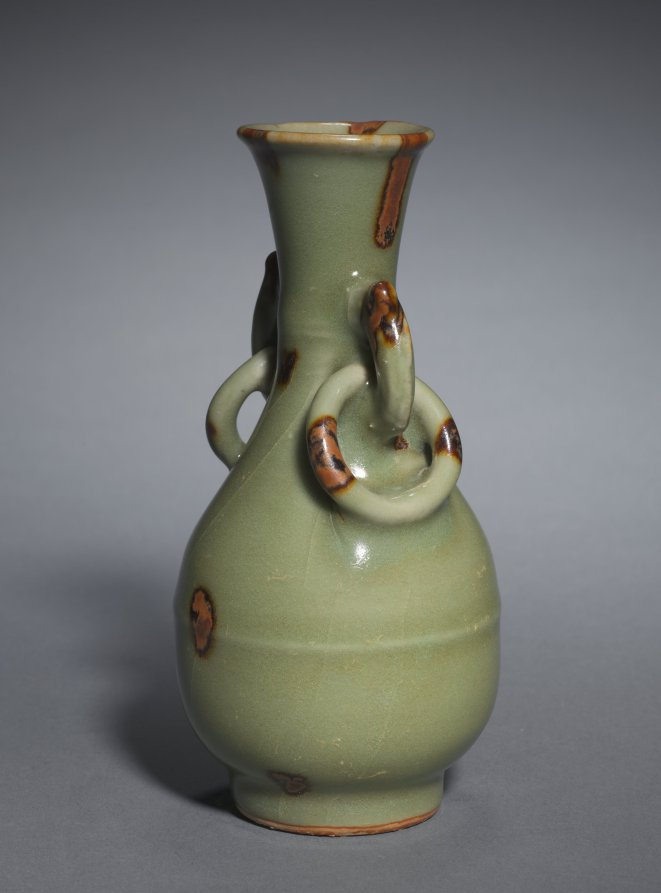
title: Bottle Vase with Ornamental Ring Handles: Longquan Ware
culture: China, Zhejiang province, Yuan dynasty (1271-1368)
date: 14th Century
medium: glazed porcelain with molded decoration and iron spots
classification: Ceramic